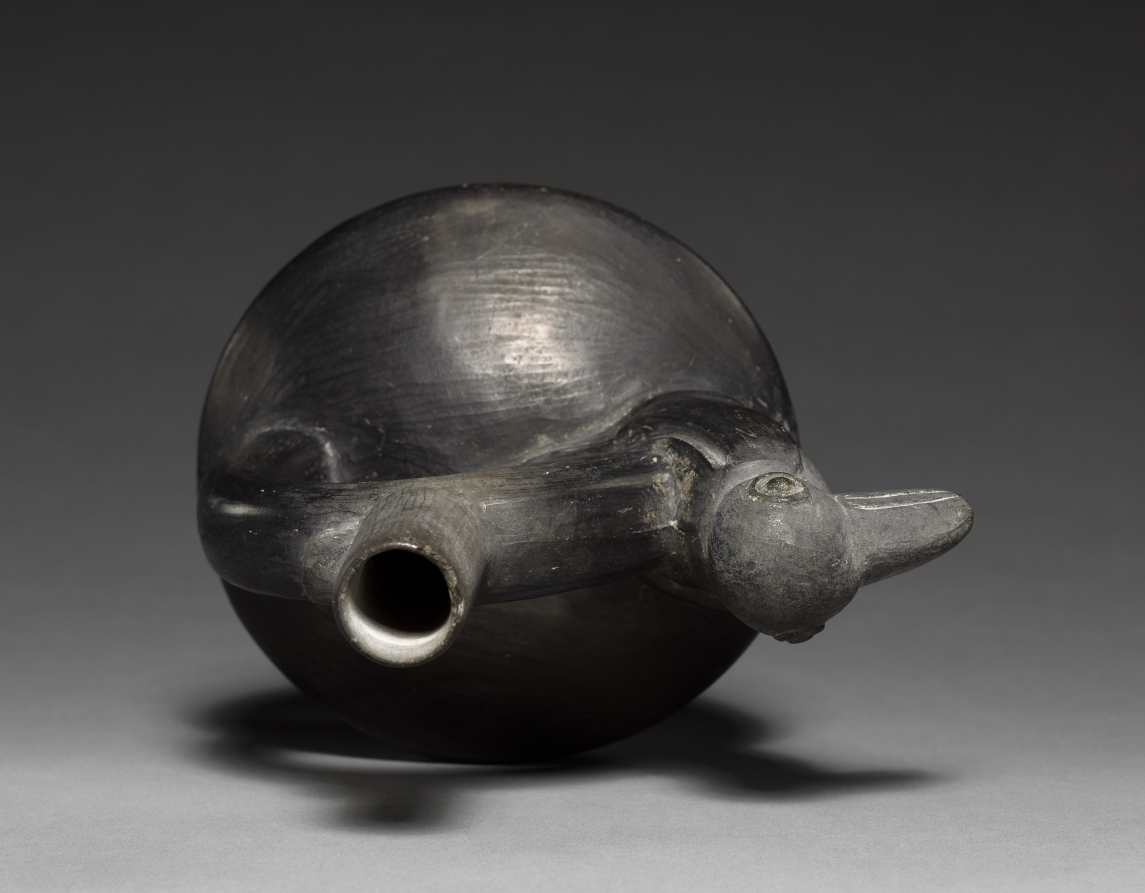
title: Vessel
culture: Peru, Chimú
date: 1300–1400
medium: black ware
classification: Ceramic